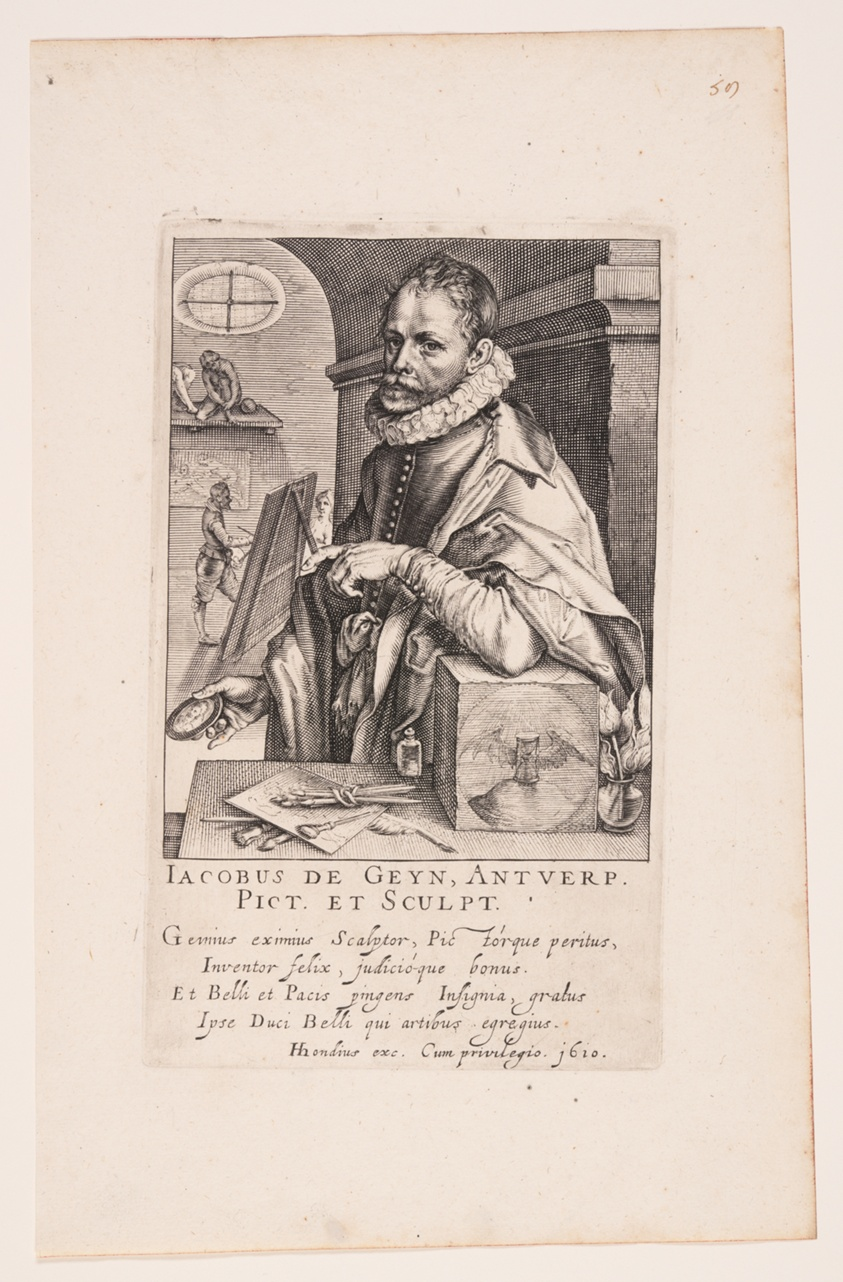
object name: Print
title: Jacob de Gheyn II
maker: Andries Jacobsz. Stock; Dutch, c. 1580–c. 1648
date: 1610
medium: Engraving on laid paper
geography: Netherlands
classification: engraving; paper; print; prints and drawing